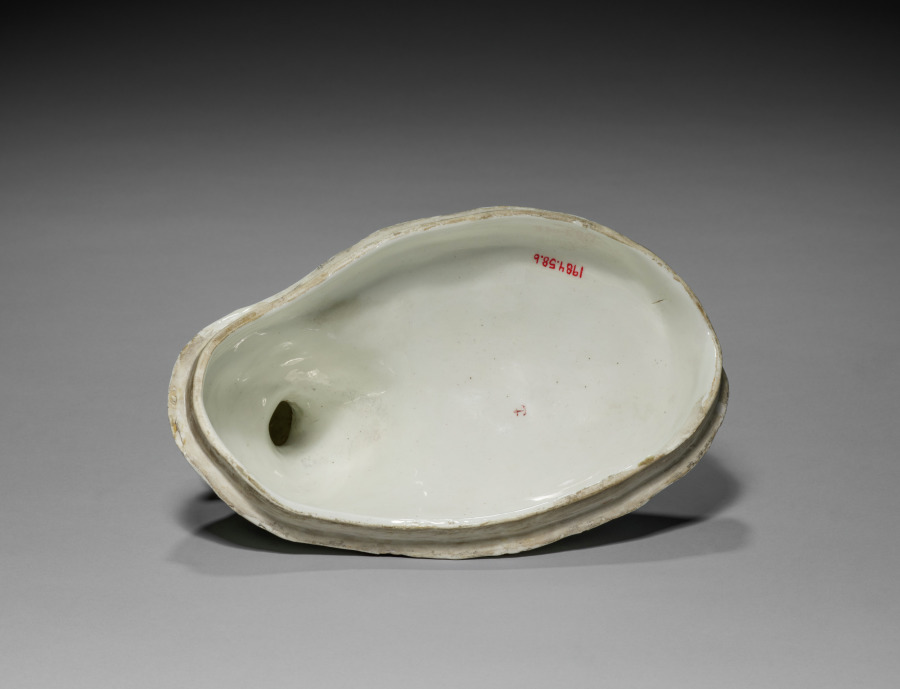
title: Cover for a Hen and Chicks Tureen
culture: England, London, Chelsea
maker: Chelsea Porcelain Factory (Britain, London, 1745–84)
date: c. 1755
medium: porcelain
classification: Ceramic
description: The ceramic factory at Chelsea, located along the river Thames in western London, was Britain’s most renowned factory of decorative porcelain in the mid-1700s. Large tureens in the form of chickens or rabbits appealed to wealthy aristocrats, who took great care in developing specimen animal and poultry breeds on their country estates. The design for this particular tureen was taken from a popular seventeenth-century print by Francis Barlow depicting a farmyard.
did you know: See cover record.